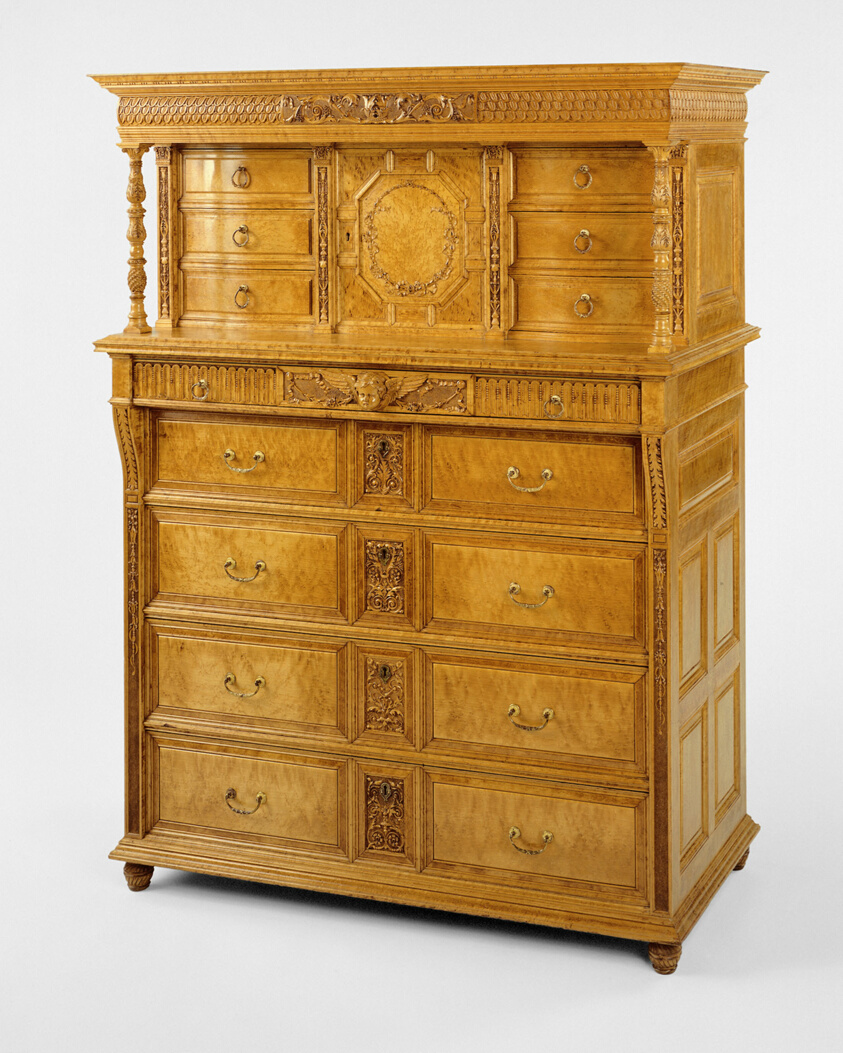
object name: Furniture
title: Chest of Drawers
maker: Artist unknown (American, 19th century); New York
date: 1878–84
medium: Bird's-eye maple, tulip poplar, and cherry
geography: New York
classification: case furniture; furniture; american decorative arts; american arts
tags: furniture